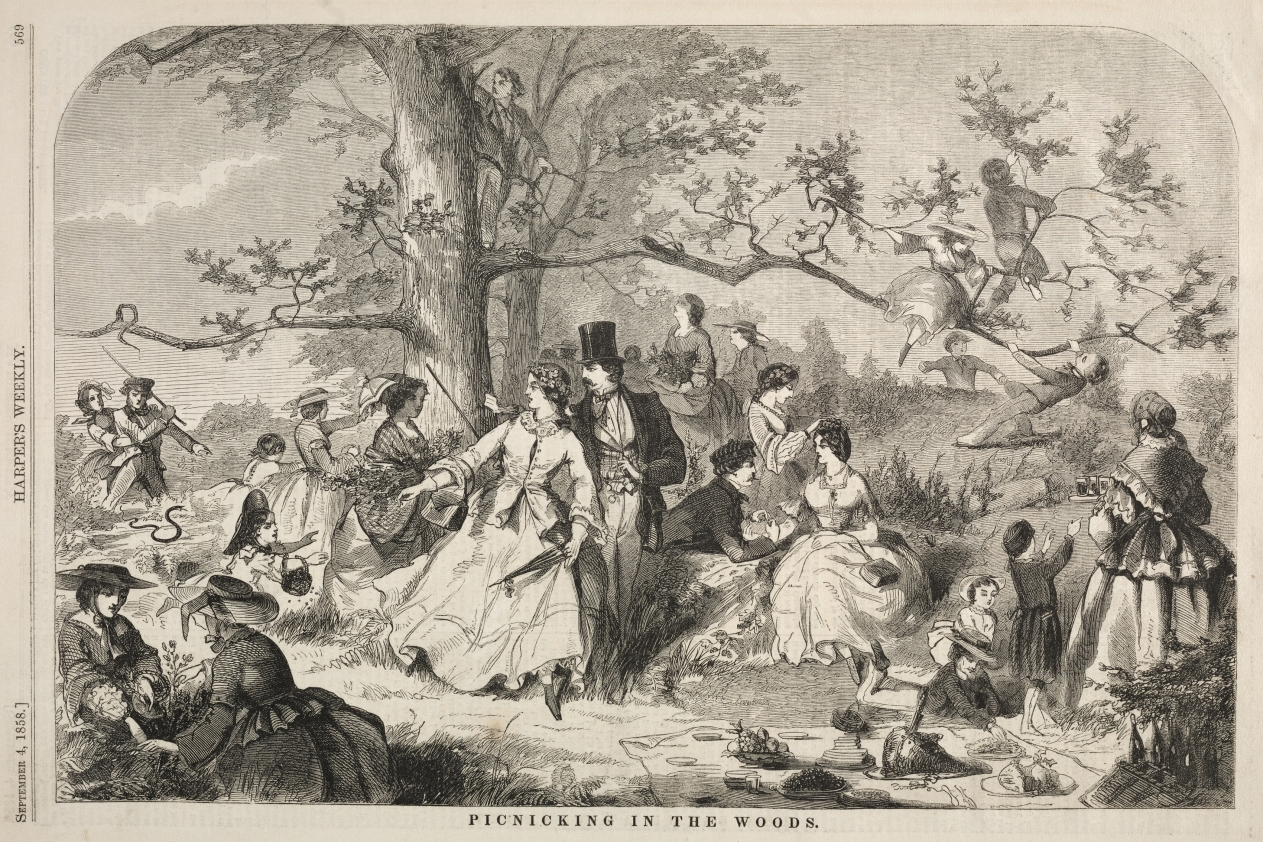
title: Picknicking in the Woods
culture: America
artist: Winslow Homer (American, 1836–1910)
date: 1858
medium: wood engraving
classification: Print